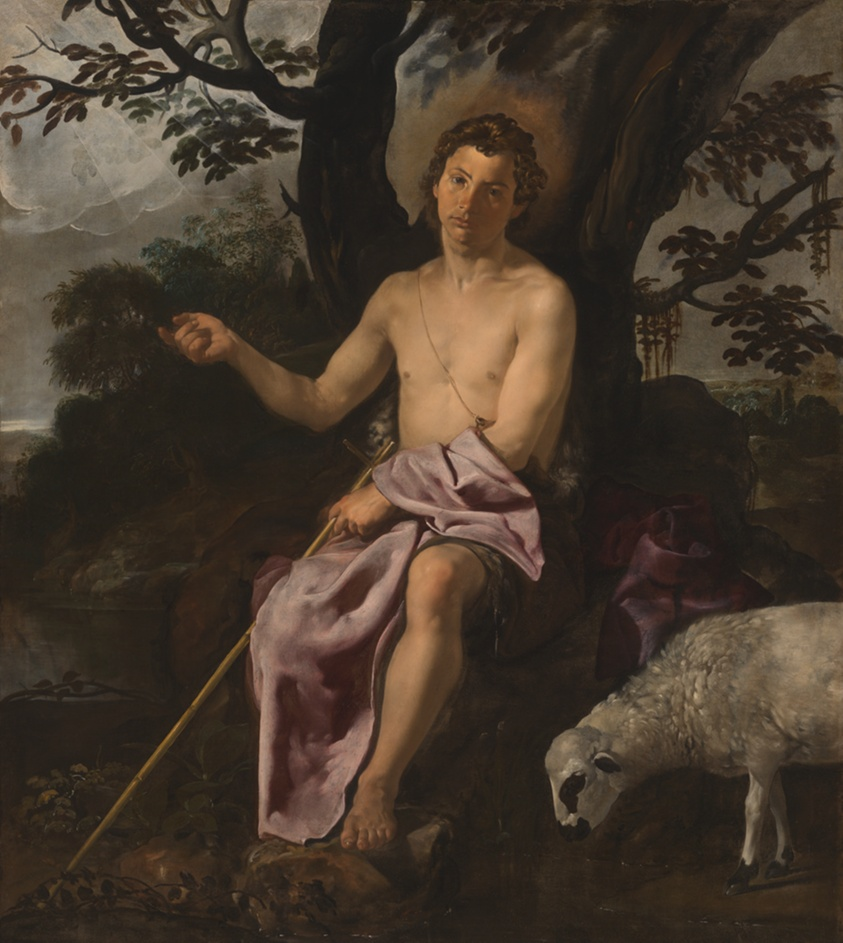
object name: Painting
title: Saint John the Baptist in the Wilderness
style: 17th Century, Baroque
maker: Diego Velázquez (Spanish, 1599–1660)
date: c. 1622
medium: Oil on canvas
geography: Seville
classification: oil on canvas; spanish; paint; oil paintings (visual works); painting; european painting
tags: Saint John the Baptist, wilderness, trees, sky, sheep, saints, religious figures, religious, religion, nature, man, leaves, leaf, foliage, cross, Christianity, Christian subjects, animals